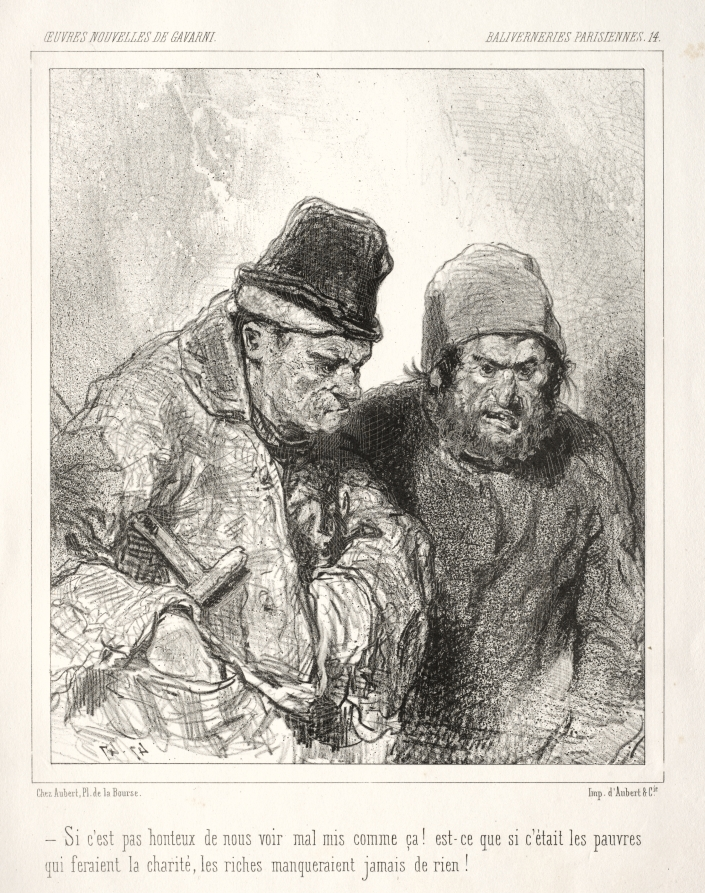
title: Baliverneries Parisiennes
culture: France, 19th century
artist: Paul Gavarni (French, 1804–1866)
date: c. 1847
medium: lithograph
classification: Print